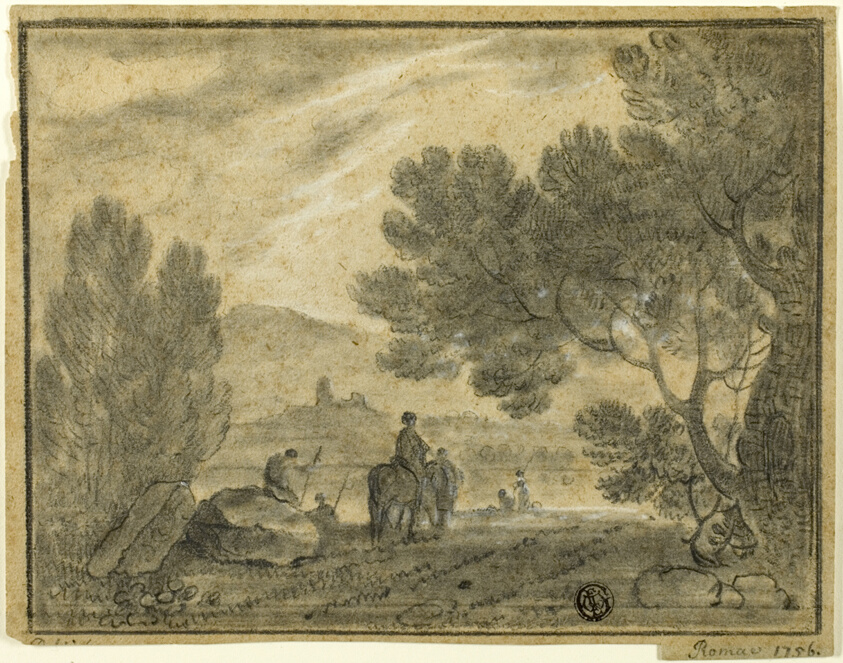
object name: Drawing and Watercolor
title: Roman Campagna with Figures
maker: Richard Wilson (English, 1714-1782)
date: 1756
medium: Black chalk with stumping, heightened with white chalk, on blue laid paper (faded to brown)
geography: England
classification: chalk; drawings (visual works); prints and drawing